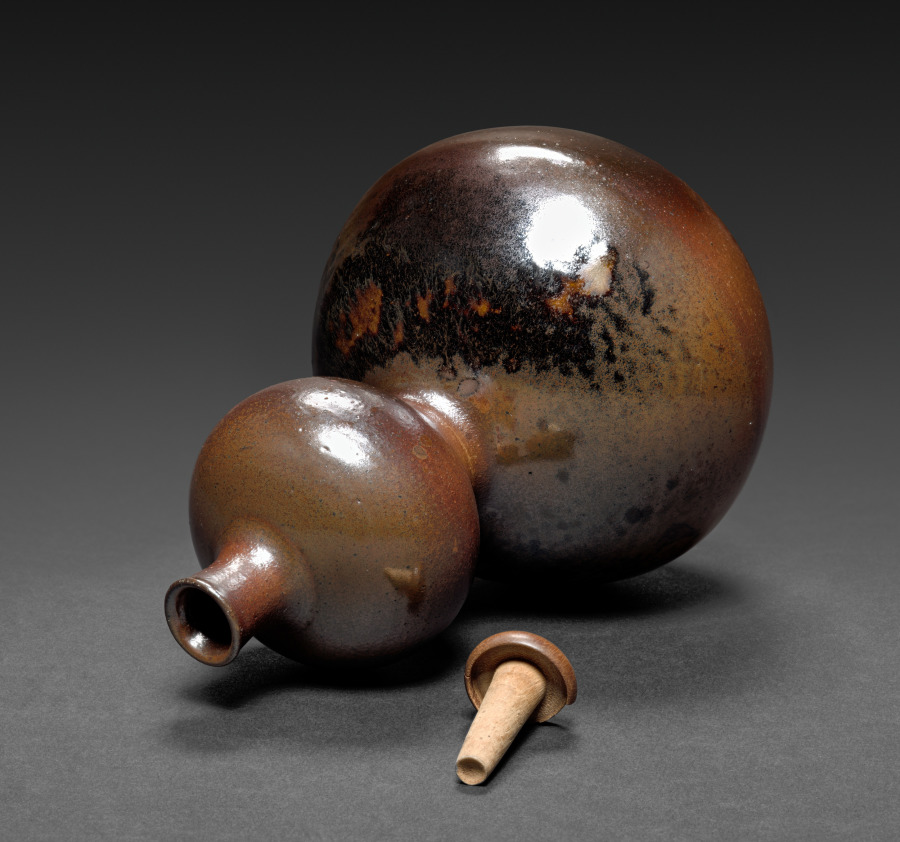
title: Double Gourd Jar with Wooden Stopple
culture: Japan, Edo period (1615–1868)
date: 1700s to mid-1800s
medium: stoneware (Bizen ware)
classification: Ceramic